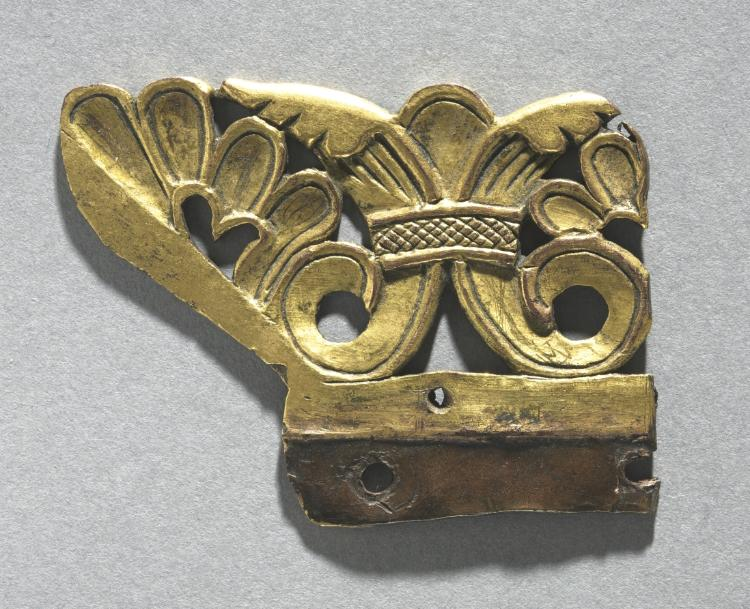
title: Fragment of an Ornamental Crest from a Reliquary Shrine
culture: Mosan, Meuse Valley, Maastricht?, Gothic period, 12th century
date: c. 1165–1180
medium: gilded copper, émail brun (brown enamel)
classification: Metalwork